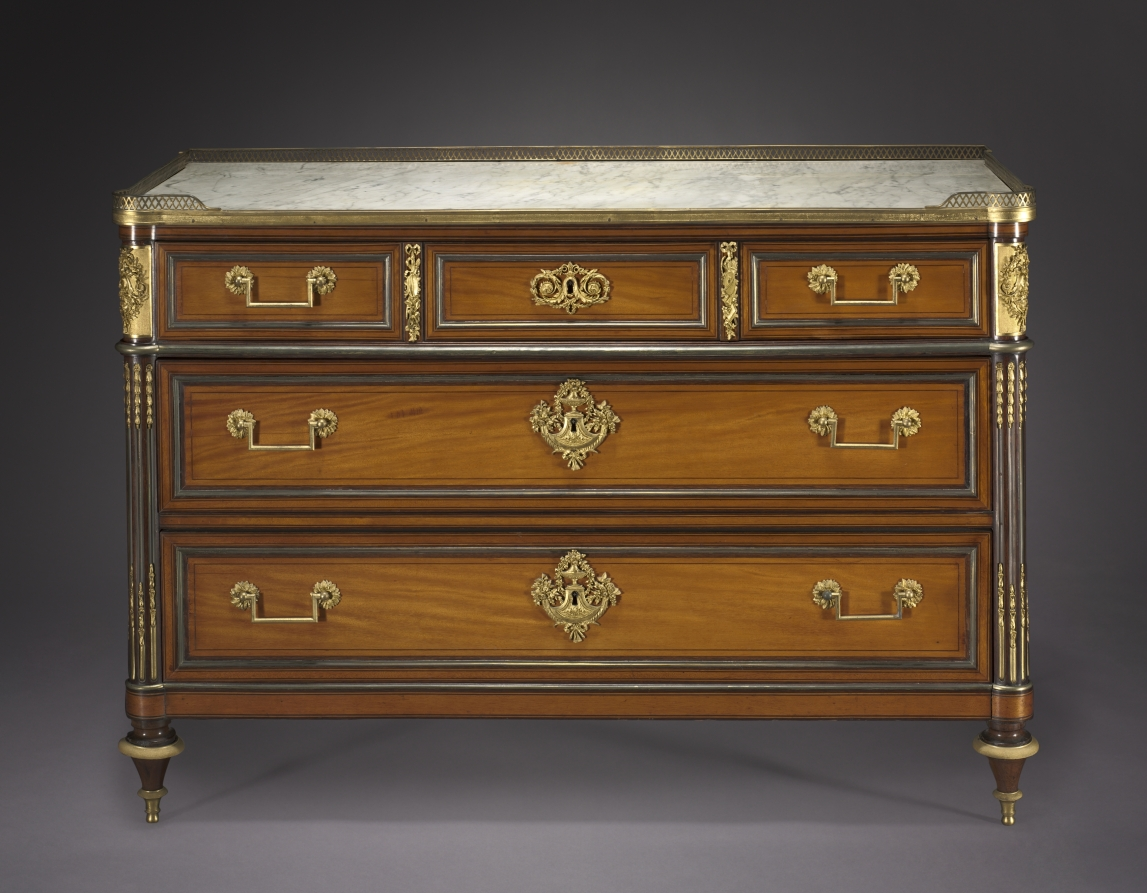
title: Chest of Drawers (Commode)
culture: France, style of Louis XVI, 18th Century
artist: attributed to Claude-Charles Saunier (French, 1735–1807)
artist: mounts in the style of Pierre Joseph Désiré Gouthière (French, 1732–1813/14)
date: c. 1775–1792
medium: oak, coralwood, mahogany veneer, marble top, gilt bronze mounts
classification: Furniture and woodwork